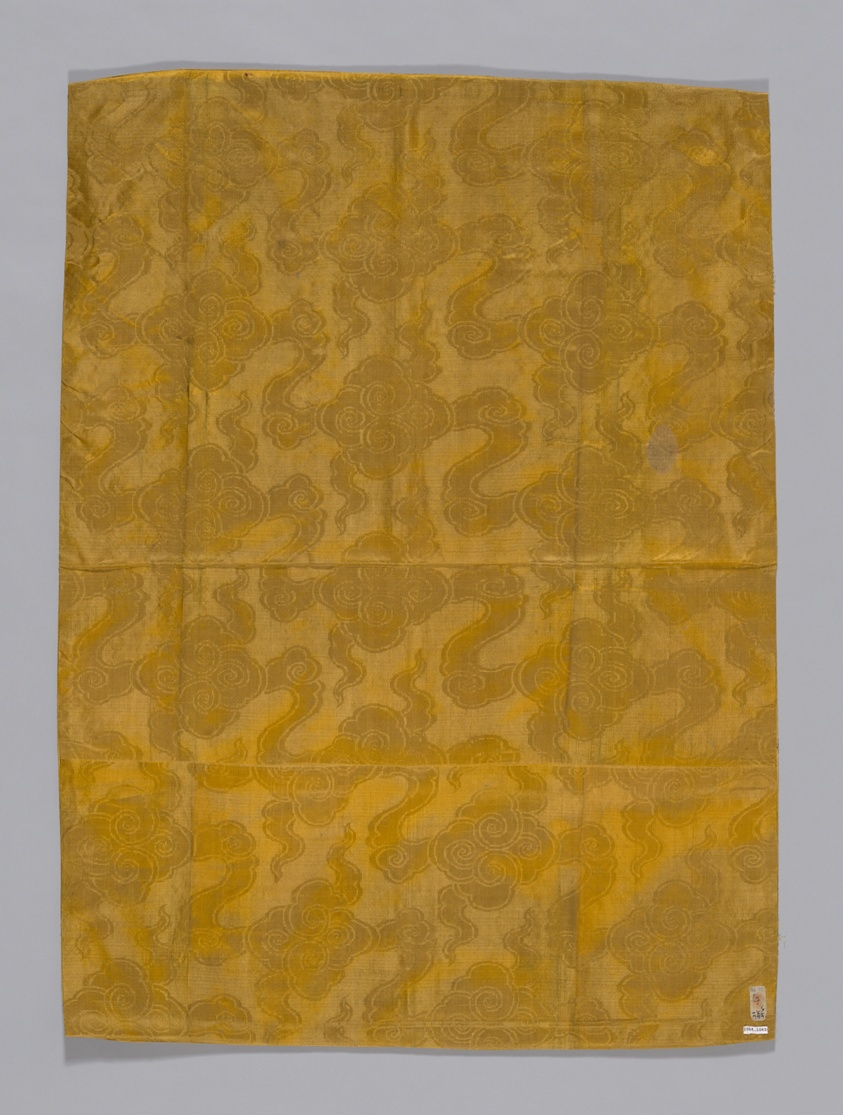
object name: Textile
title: Cover (Furnishing Fabric)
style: qing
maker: China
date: Qing dynasty (1644–1911), 1850/75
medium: Yellow ground with additions of paint.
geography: China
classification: textile; weaving; furnishing textile